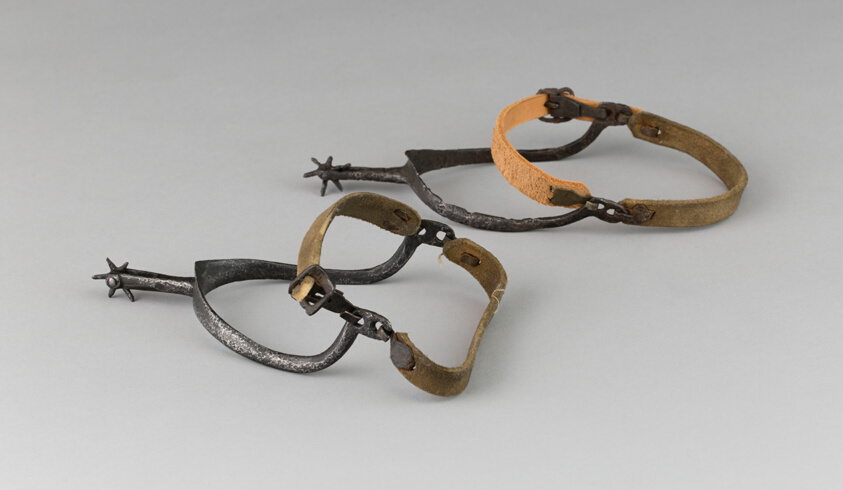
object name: Armor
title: Pair of Spurs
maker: European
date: late 14th century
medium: Iron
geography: Europe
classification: horse equipment; armor; arms and armor